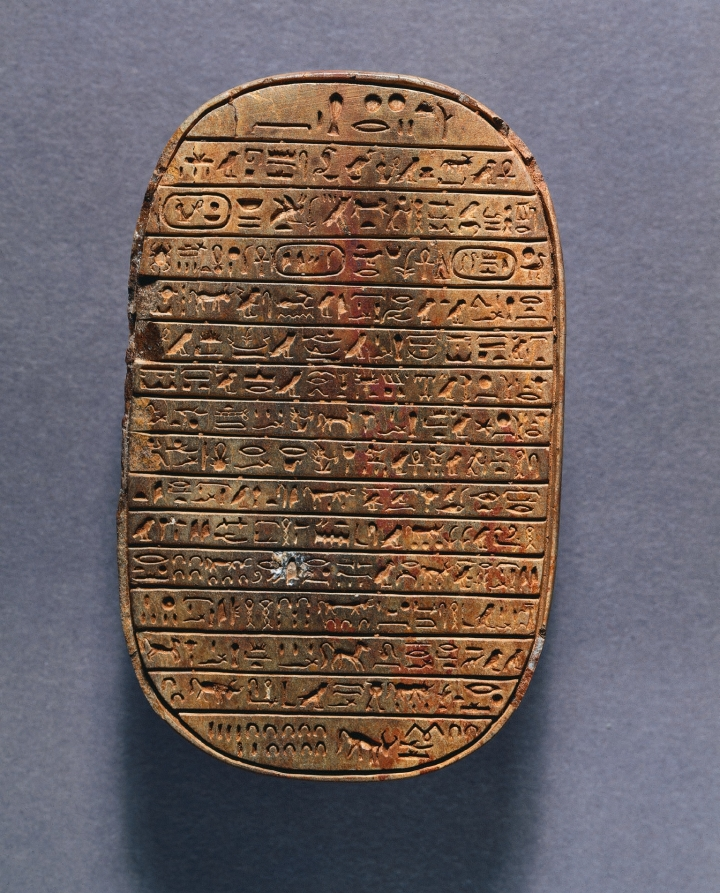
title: Wild Bull Hunt Scarab of Amenhotep III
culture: Egypt, New Kingdom (1540–1069 BCE), Dynasty 18, reign of Amenhotep III (1390–1352 BCE)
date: c. 1391–1353 BCE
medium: steatite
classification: Scarabs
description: Large commemorative scarabs are characteristic of Amenhotep III’s reign. About 200 are known, and all are inscribed with texts on their undersides, recording significant events in the life of the king and queen. This particular scarab is one of only 5 known examples that describe a royal bull hunt undertaken in his second year of rule, in which the king killed 96 bulls. More than just a pastime, the king’s success as a hunter symbolized the triumph of royal order over the forces of nature and chaos.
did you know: The variation in tone appears to be related to inclusions and pigmentation in the stone.